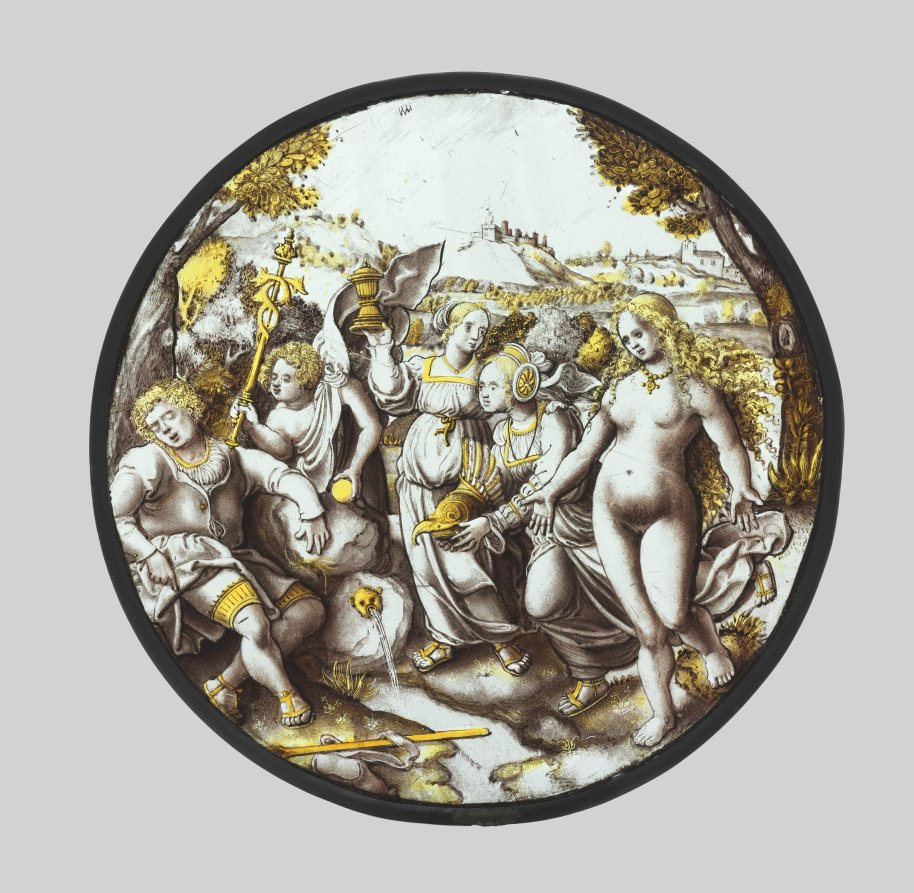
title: The Judgment of Paris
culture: South Netherlands, 16th century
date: c. 1510–20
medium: silver-stained glass roundel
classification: Glass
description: Hermes awakens the shepherd Paris to hand him the golden apple, which he is to present to the most beautiful of the three goddesses: Venus (foreground), Juno, or Minerva. The panel was produced by means of a compound of silver oxide, which, when applied to the glass and then fired in a kiln, turned into a translucent yellow stain. The culminating effects of different pigments and shadings required subsequent firings.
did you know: The bright yellow tones in stained glass are made using a solution of silver oxide.